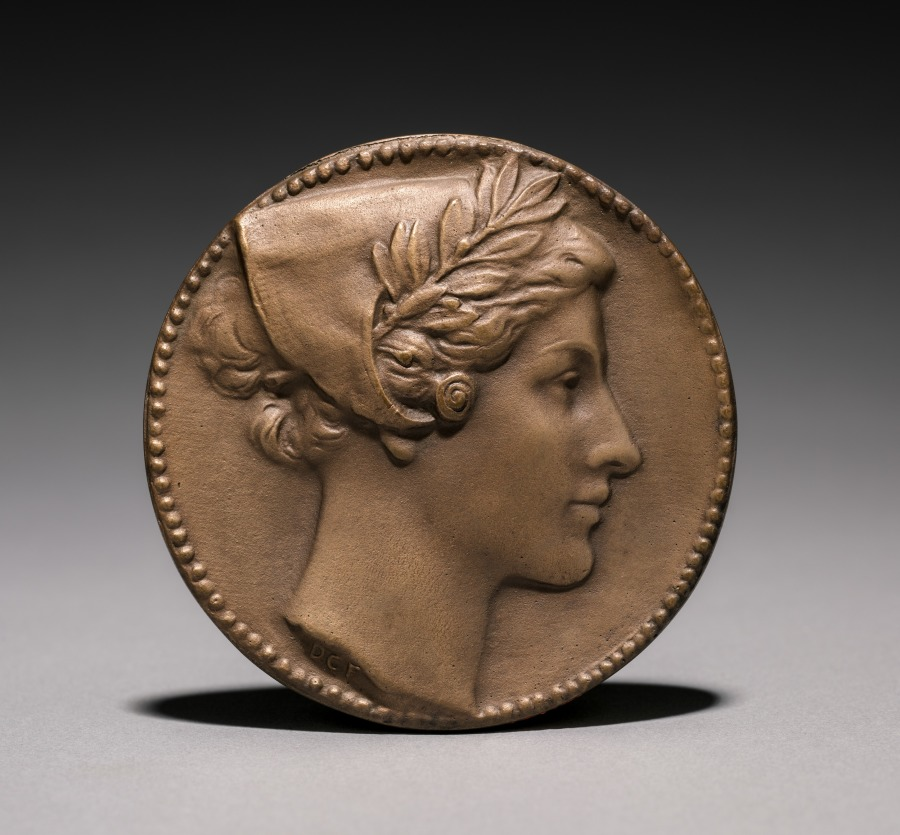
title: Medal Commemorating the Completion of Catskill Aqueduct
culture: America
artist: Daniel Chester French (American, 1850–1931)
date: 1918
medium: bronze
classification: Metalwork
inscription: inscribed: D.C.F.